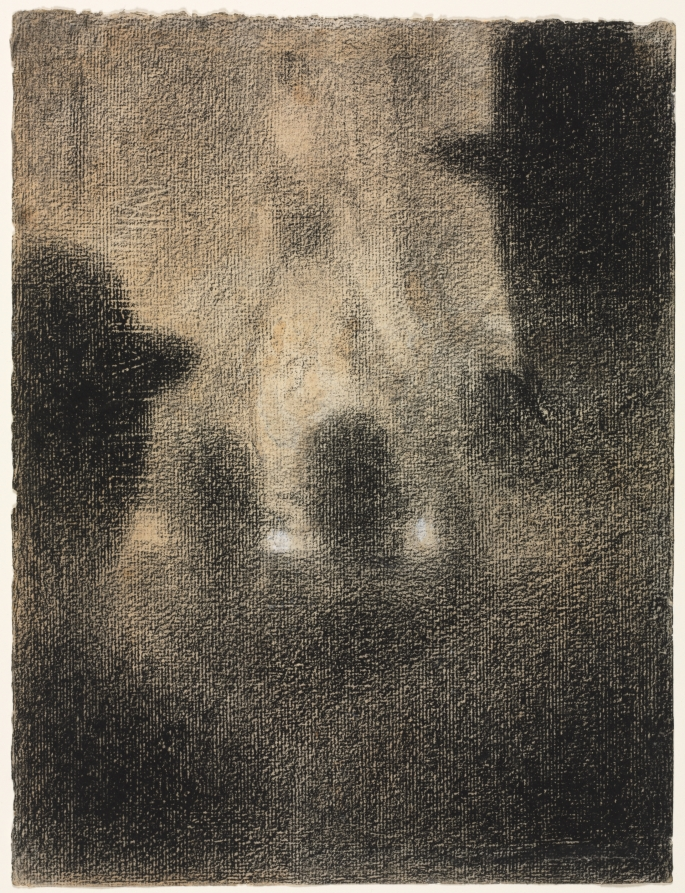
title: At the Concert Parisien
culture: France, 19th century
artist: Georges Seurat (French, 1859–1891)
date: 1887–88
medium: conté crayon heightened with white chalk on cream handmade modern laid paper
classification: Drawing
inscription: inscribed on verso, at bottom, in blue crayon: G. Seurat / L (?) [upside down]; on verso, right center, in red crayon: 299 [posthumous inventory number]; watermark, upper left: MICHALLET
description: Café-concerts were popular places of entertainment for the middle classes in Paris during the late 1800s and usually featured singers or other forms of vaudeville entertainers. Georges Seurat created eight drawings depicting café-concerts, some showing known establishments. This drawing has an innovative viewpoint, in which we peer through the bowler hats of male viewers listening to a female singer on stage. Seurat typically used a black crayon manufactured by the Conté company, and its waxy quality allowed him to exploit the texture of paper to striking effect.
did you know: Despite Georges Seurat's brief lifespan, he created a large number of drawings, working almost exclusively with the waxy Conté crayon and textured paper used for this sheet.